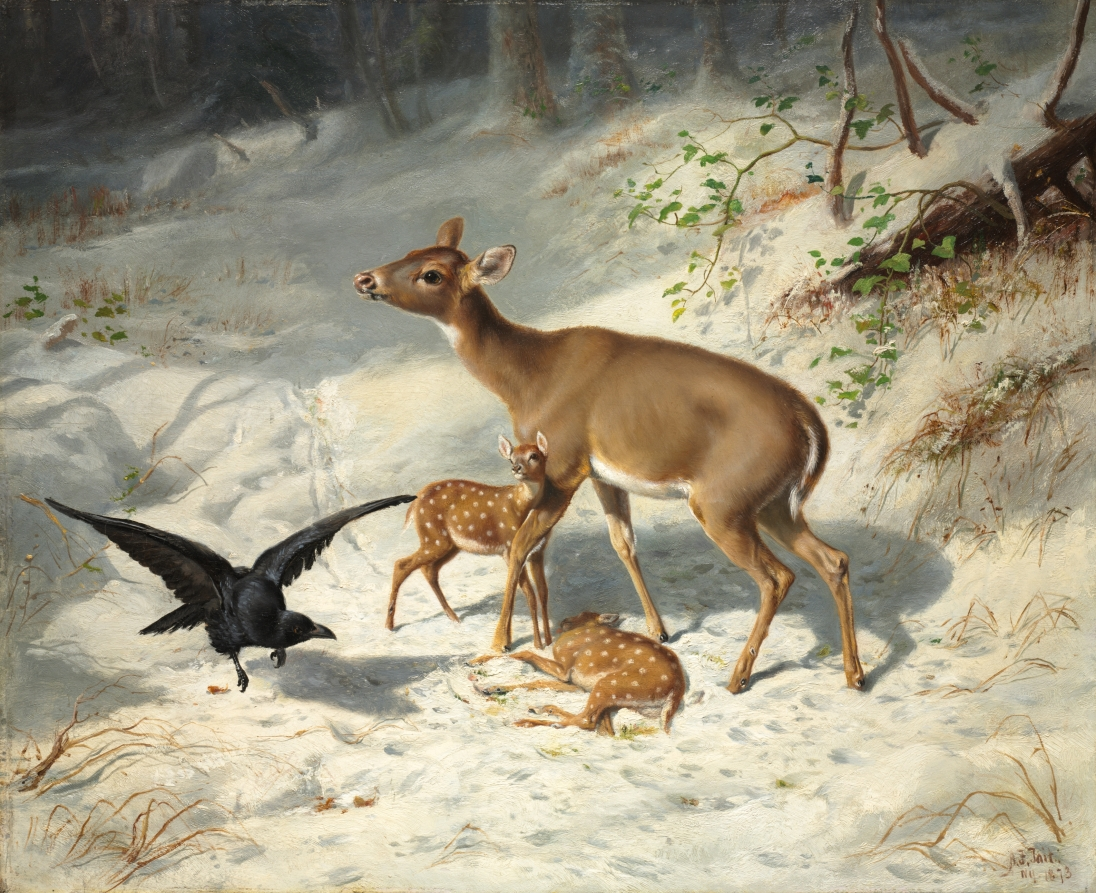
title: Maternal Solicitude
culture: America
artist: Arthur Fitzwilliam Tait (American, born England, 1819–1905)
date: 1873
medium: oil on wood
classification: Painting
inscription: Signed lower right: "A. F. Tait. . / N.Y. 1873"; inscribed on the back: " 'Maternal Solicitude' (The Dying Fawn)"